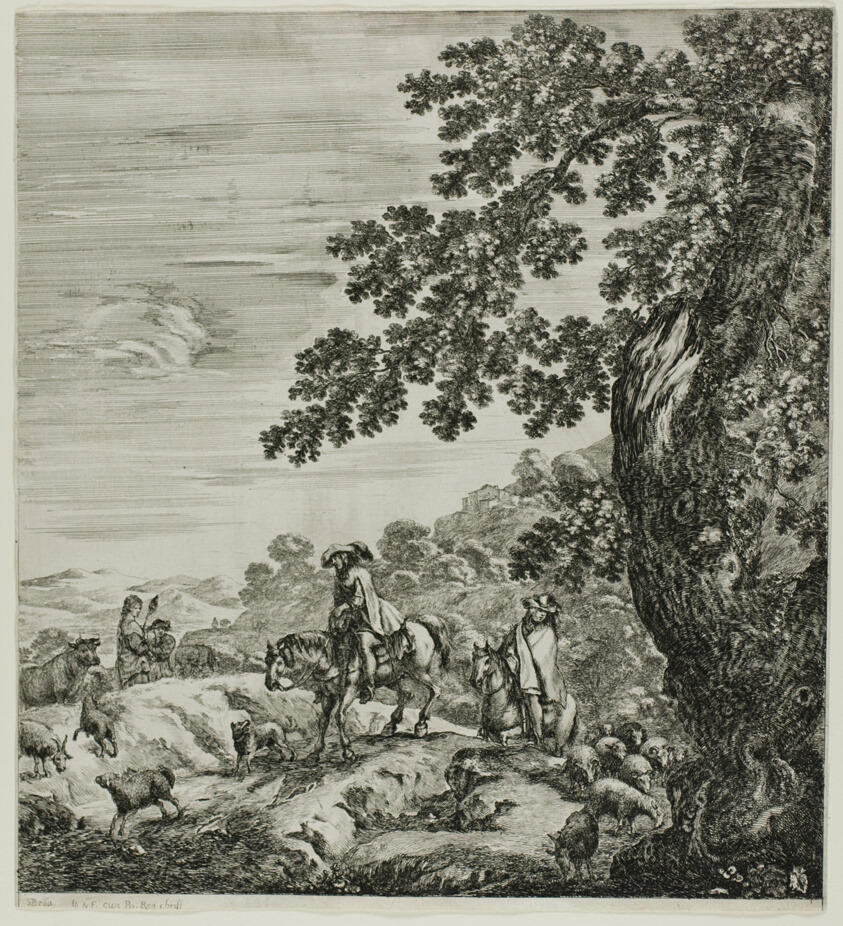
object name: Print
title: Two Riders Passing a Flock, plate five from The Six Large Views of Rome and the Campagna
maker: Stefano della Bella (Italian, 1610-1664)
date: 1654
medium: Etching on ivory laid paper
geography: Italy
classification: etching; print; prints and drawing